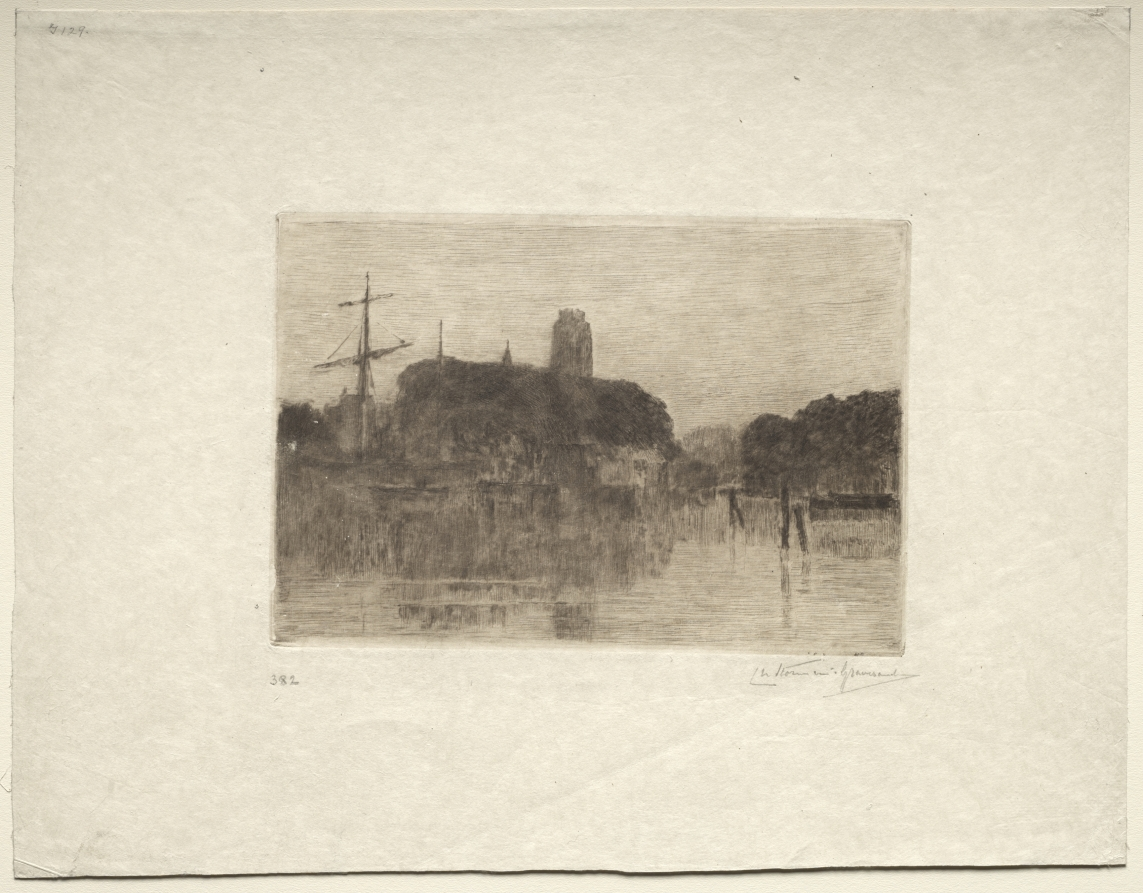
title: Dordrecht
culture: Netherlands, late 19th-early 20th century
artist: Charles Nicolas Storm van 's-Gravesande (Dutch, 1841–1924)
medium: etching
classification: Print